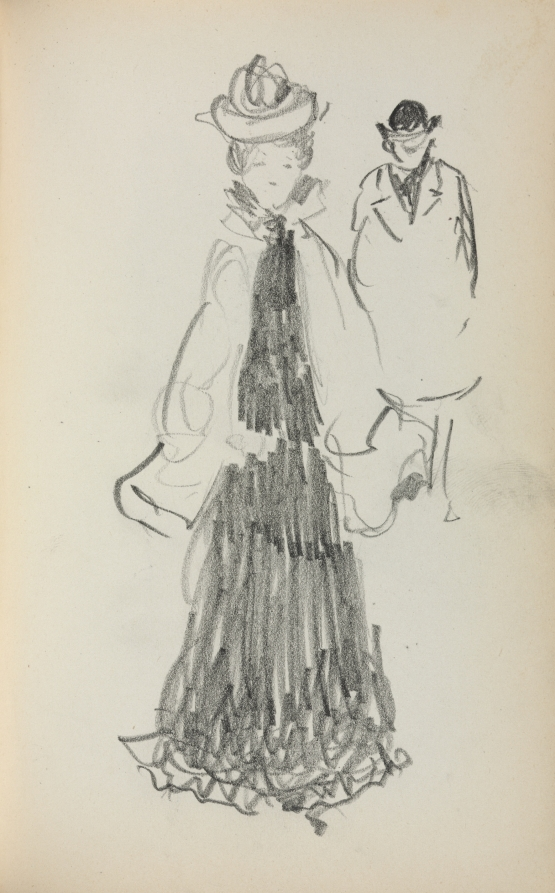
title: Italian Sketchbook: Standing Woman and Man (page 125)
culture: America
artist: Maurice Prendergast (American, born Newfoundland [now Canada], 1858–1924)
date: 1898–1899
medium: pencil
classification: Bound Volume